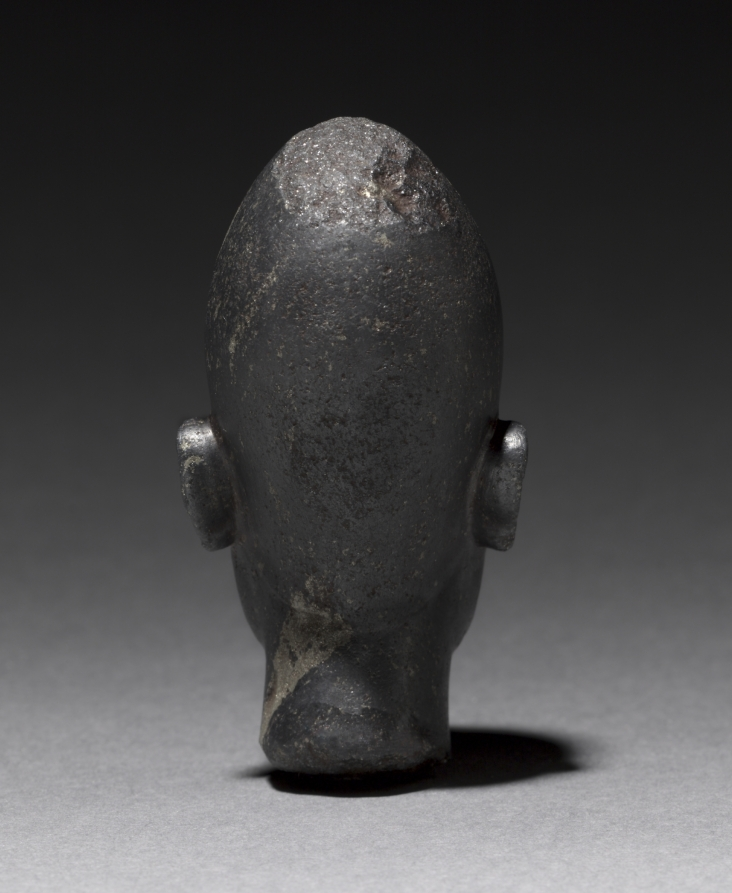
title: Head of Foreign God or Prince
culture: Egypt or Syria, New Kingdom (1540–1069 BCE), Dynasty 18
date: c. 1320 BCE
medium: black magnetite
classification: Sculpture